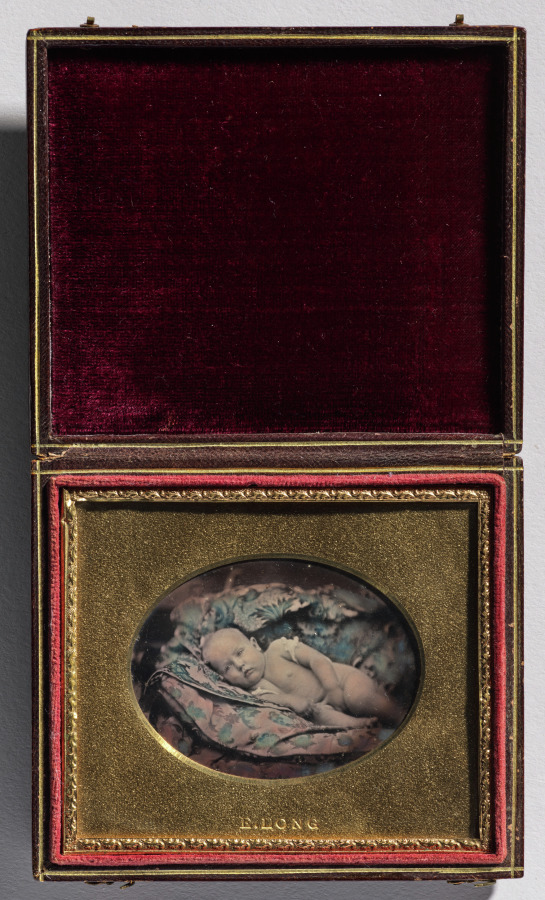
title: Alice Montgomery (1850-1917)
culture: America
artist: Enoch Long (American, 1823–1898)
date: 1850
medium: daguerreotype, applied color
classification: Photograph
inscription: Written in black ink on enclosed paper: "Alice Montgomery / 1850-1917"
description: Children have always been particularly cherished subjects for photography. Portraits were made to preserve the memory of their stages of growth and, in an age when long-distance travel was rare, to share with faraway relatives. And, for a sadder reason: in 1840 an estimated one-third of children died before age five. Photography offered grieving parents the opportunity to immortalize their children’s features. This tragic genre of photographs, later called “post-mortems,” often depicts the children in fine clothing, laying down with eyes shut, as if merely napping.